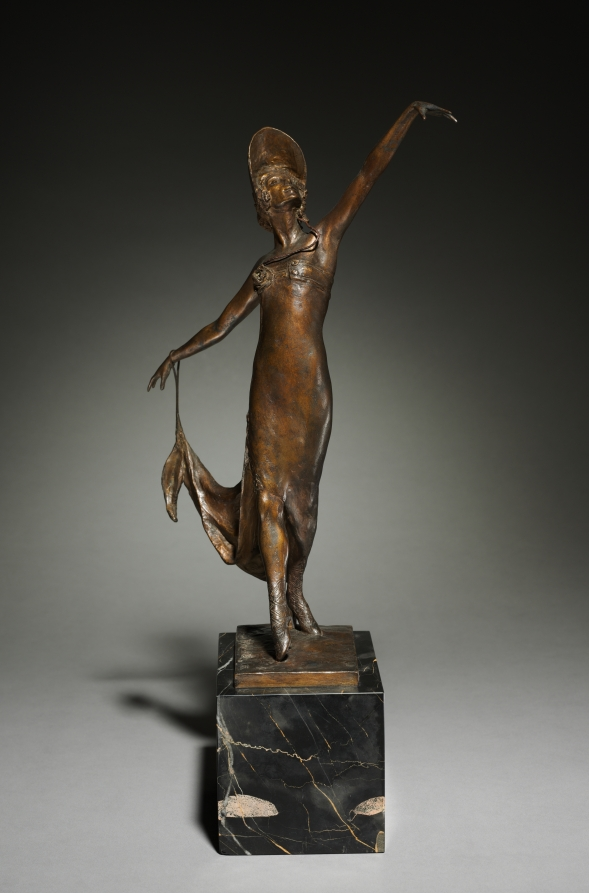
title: Pavlova Dancing the Gavotte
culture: America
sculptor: Malvina Hoffman (American, 1887–1966)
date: 1915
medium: bronze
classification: Sculpture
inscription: Signed on base: "Malvina Hoffman 1915, IX ©"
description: Sculptor Malvina Hoffman met the acclaimed Russian ballerina Ana Pavlova in New York during the spring of 1914. This bronze rendering of the dancer, posed with broadly outstretched arms, was created the following year. At the time, Pavlova was attempting to popularize a Russian version of the French folk dance known as the gavotte.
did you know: A pavlova is a meringue-based dessert inspired by the shape of ballerina Anna Pavlova's tutu.